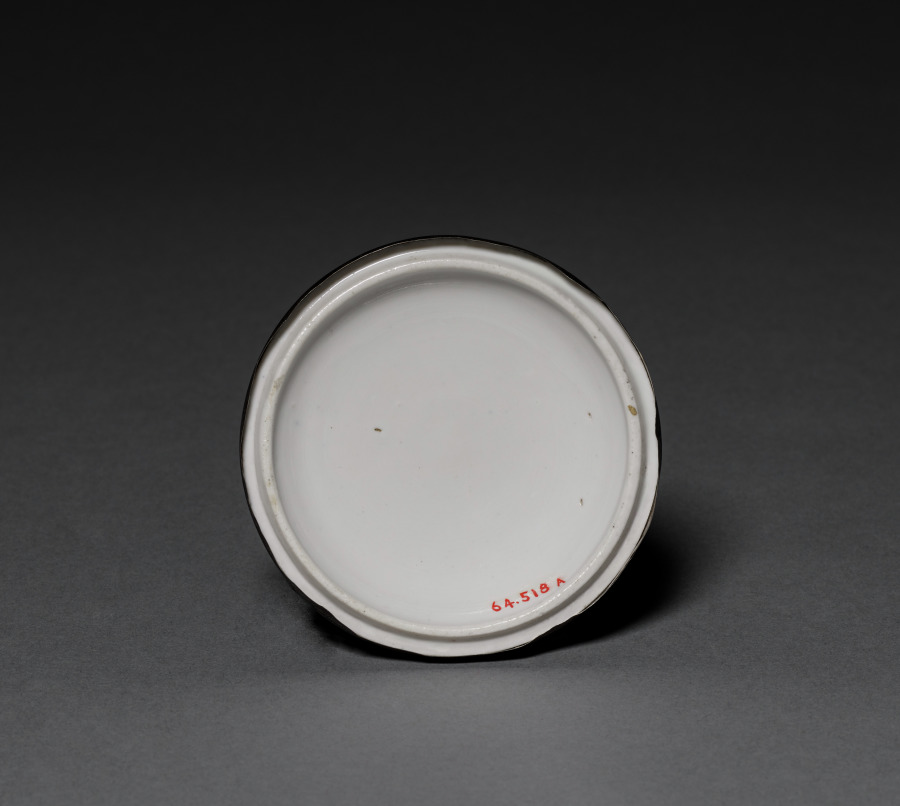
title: Lid for a Jar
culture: France, 18th century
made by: Faubourg Saint-Denis (French)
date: c. 1775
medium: porcelain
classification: Ceramic